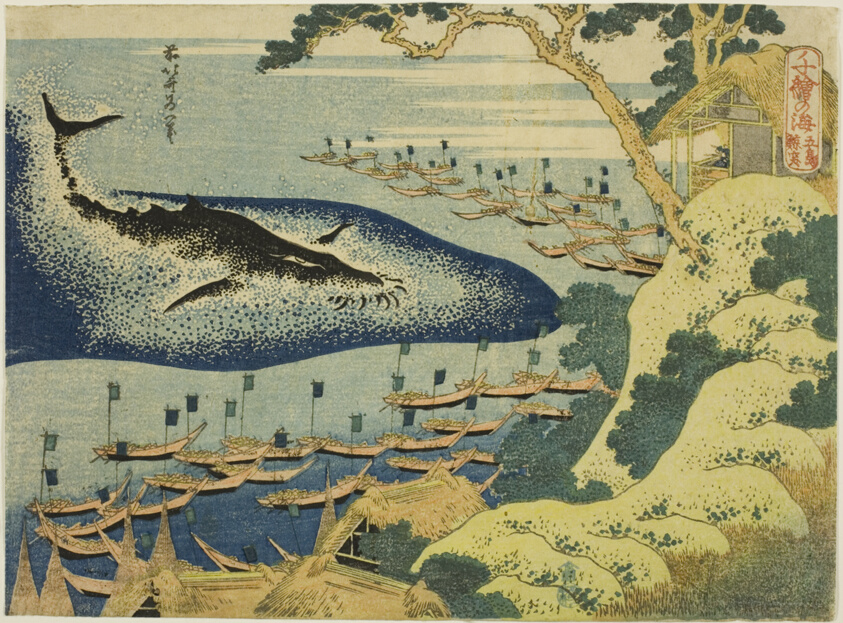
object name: Print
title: Whaling off the Coast of the Goto Islands (Goto kujira tsuki), from the series "One Thousand Pictures of the Ocean (Chie no umi)"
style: Japanese (culture or style)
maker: Katsushika Hokusai 葛飾 北斎; Japanese, 1760-1849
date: c. 1831–33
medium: Color woodblock print; chuban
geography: Japan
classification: print; asian art